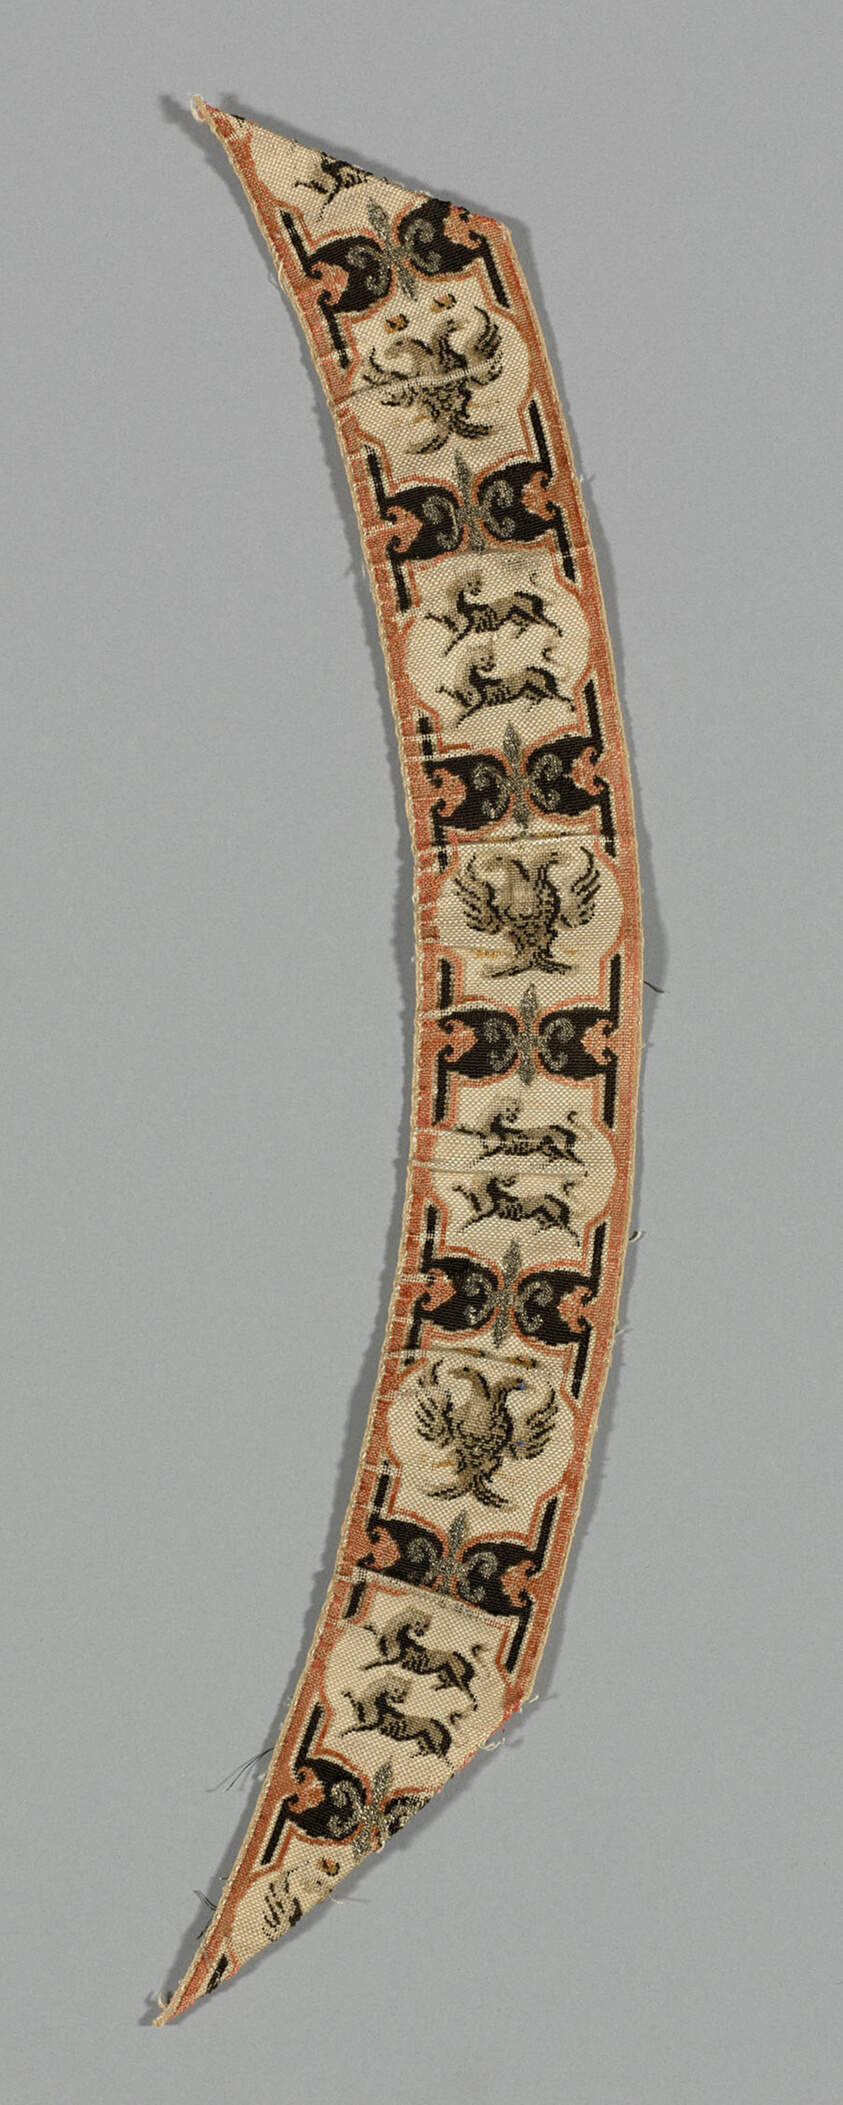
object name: Textile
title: Uncut Yardage (Ribbon)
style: qing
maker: China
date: 18th century, Qing dynasty (1644–1911)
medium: Silk, plain weave; painted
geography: China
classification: textile; weaving